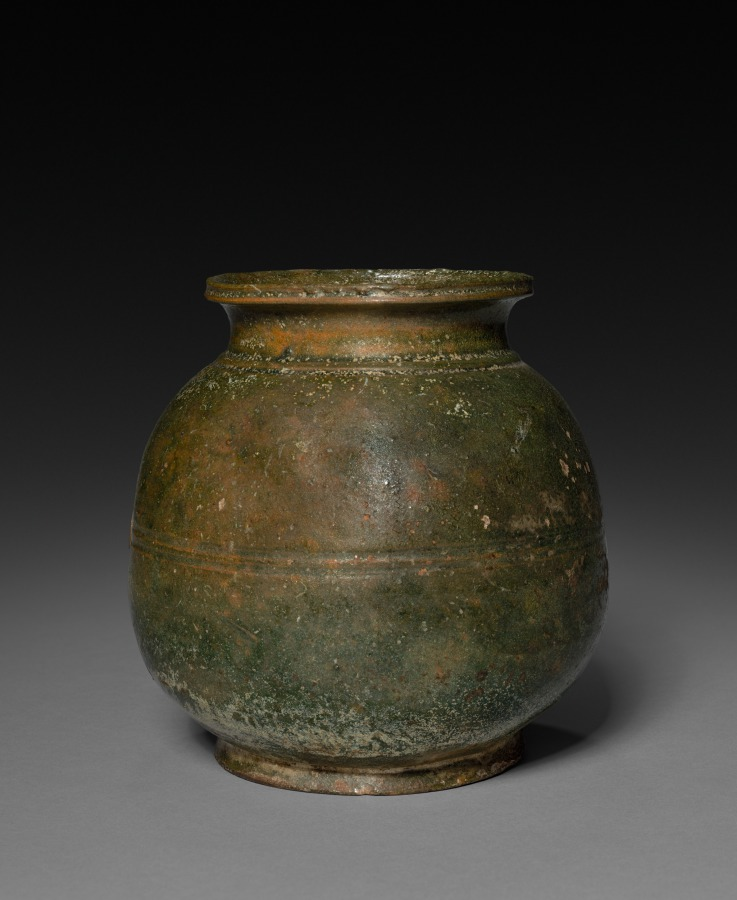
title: Jar with Cover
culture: China, Han dynasty (202 BCE–220 CE)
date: 206 BCE–220 CE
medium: glazed earthenware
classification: Ceramic